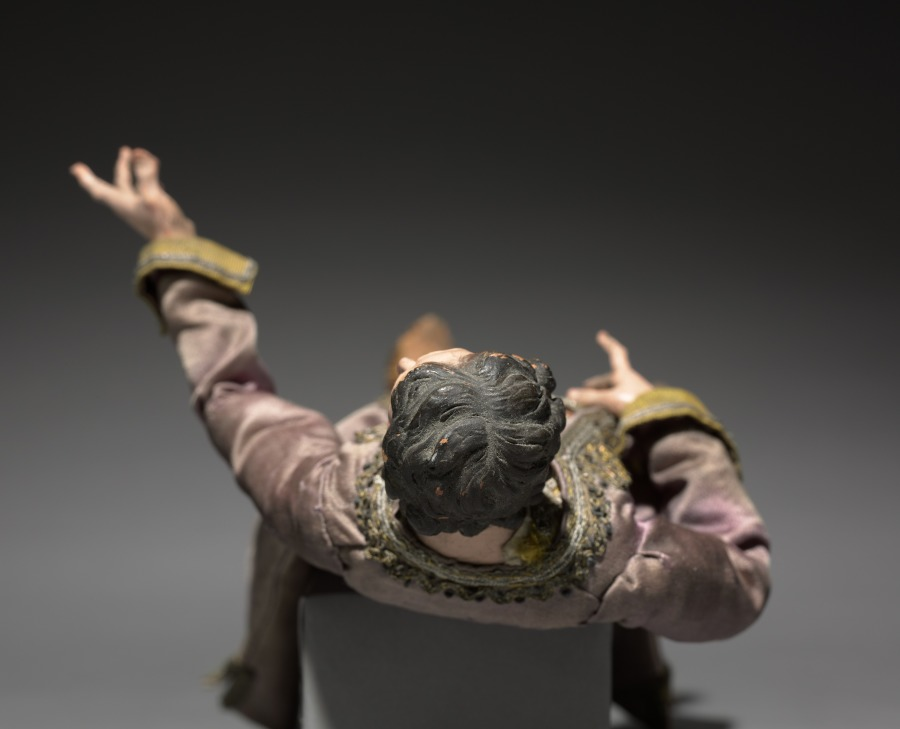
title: Figure from a Crèche: Standing Man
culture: Italy, Naples, late 18th-early 19th century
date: 1780–1830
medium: painted wood and terracotta with various textiles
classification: Sculpture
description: The practice of creating scenes of the Nativity for the home dates from the early 1700s in Italy, where people began to set up doll-like figures of about a foot or less in height. The custom was particularly popular in Naples around 1800, where crèche scenes (crèche means cradle, or crib) included many figures, whose heads and hands of painted terracotta, stuffed cloth bodies, and clothing adapted from contemporary local costumes gave them an amazingly realistic character. Representations of the birth of Jesus can be traced to the first few centuries of Christianity. Both living creatures and sculptural depictions of them were used from early times. By the late middle ages it was customary to create life-size figures of wood or stone, naturalistically painted, to represent the characters who participated in the events of Jesus's early life. These sculptures were then arranged in scenes illustrating one or both of the most important of these events, the Adoration of the Shepherds and the Adoration of the Magi—the three kings from the East who came to pay homage to the Christ child. Used in churches, these large figures were especially popular in Italy, Central Europe, Spain, and Portugal.